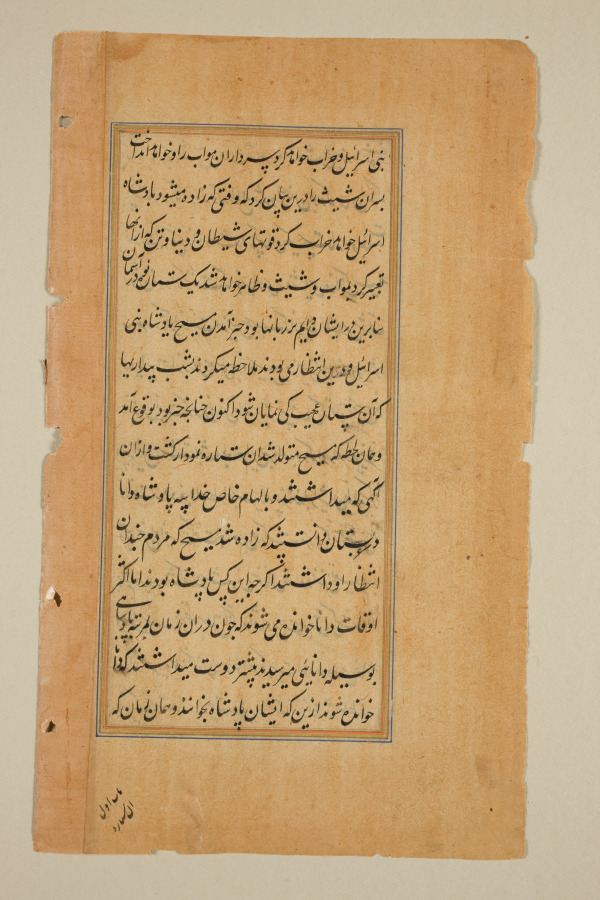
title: Text page from a Mirror of Holiness (Mir’at al-quds) of Father Jerome Xavier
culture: Mughal India, Allahabad, made for Prince Salim (1569–1627)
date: 1602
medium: Ink and gold on paper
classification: Manuscript